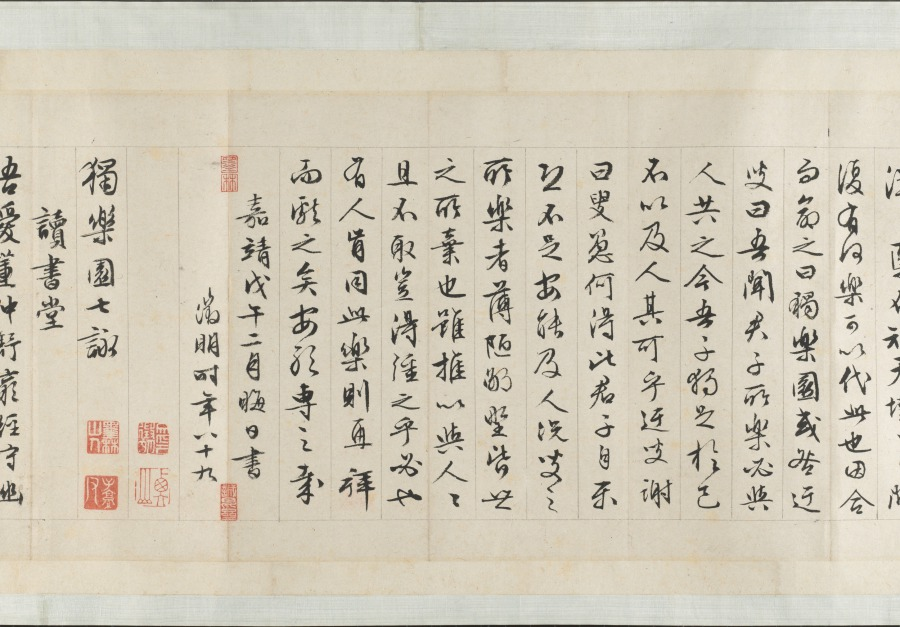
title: Garden for Solitary Enjoyment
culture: China, Ming dynasty (1368–1644)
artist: Qiu Ying (Chinese, 1494–1552)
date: 1515–52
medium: Handscroll; ink and light color on silk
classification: Painting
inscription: Accompanying text of an essay together with seven poems of Sima Guang (1019–1086) and one poem of Su Shi (1037–1101) written by Wen Zhengming (1470–1559) in 1558.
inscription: 2 colophons and 82 seals: 4 seals of Wen Zhengming 文徵明 (1470–1559); 59 seals of Xiang Yuanbian 項元汴 (1525–1590); 1 colophon, dated 1644, and 7 seals of Xiang Yukui 項禹揆 (c. late 1500s–1659); 1 colophon, dated 1880, and 2 seals of Weng Tonghe 翁同龢 (1830–1904); 2 seals of Ch'eng Chen-i (19th c.); 1 seal of Han Ch'ung (19th c.); 4 seals of Wan-go H. C. Weng 翁萬戈 (1918–2020); 3 seals unidentified.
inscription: Colophon by Xiang Yukui 項禹揆 (c. late 1500s–1659): The painting of The Garden for Self-enjoyment on the right by Shih-chou, Mr. Qiu [Qiu Ying] is in the style of Li Lung-mien. Its mood is peaceful, as if meeting the ancient gentlemen face to face among the brushes and silk; it lifts one above the sordid bustle of life. Formerly, my late father handed me this scroll which had only the painting without the written essay. I considered asking a good calligrapher to write the essay to add to it but was afraid that the quality of the writing would not match the painting. Several years later, I saw at a friend's house this essay and poems (of Ssu-ma Kuang] written by Hengshan [Wen Zhengming], once owned by my grandfather; so I spared no expense to obtain it. I rejoiced at this and said: "The divine swords are finally united. How things are pre-destined!" Now my friend Chang Kung-chao's technique for mounting [painting and calligraphy] is excellent. Therefore by daring to take them out and join them together, I can preserve this beautiful story of singular reunion. Xiang Yukui recorded at Hai-yeh-t'ang [hall] two days before New Year's Eve in the jiasheng year of the Chongzhen era [1644]. trans. LYSL/HK/WKH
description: Garden of Solitary Enjoyment refers to a site built in 1073 by the statesman Sima Guang (1019–1086) after he had retired to Luoyang, Henan province. Every spring, visitors would flock to his garden. Each of its seven structures references a historic figure. Sima wrote: I channel streams [like Du Mu], to water flowers [like Bai Juyi], or trim bamboo [like Wang Huizhi]. . . . I know of no joy between heaven and earth that could take its place. Qiu Ying’s painting, created after an 11th-century version of the same theme, must have appealed to garden owners of the Ming dynasty, since it became the template for numerous Suzhou workshop copies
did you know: Sima Guang completed his monumental survey of Chinese history, Zizhi tongjian, in the garden depicted in this painting.